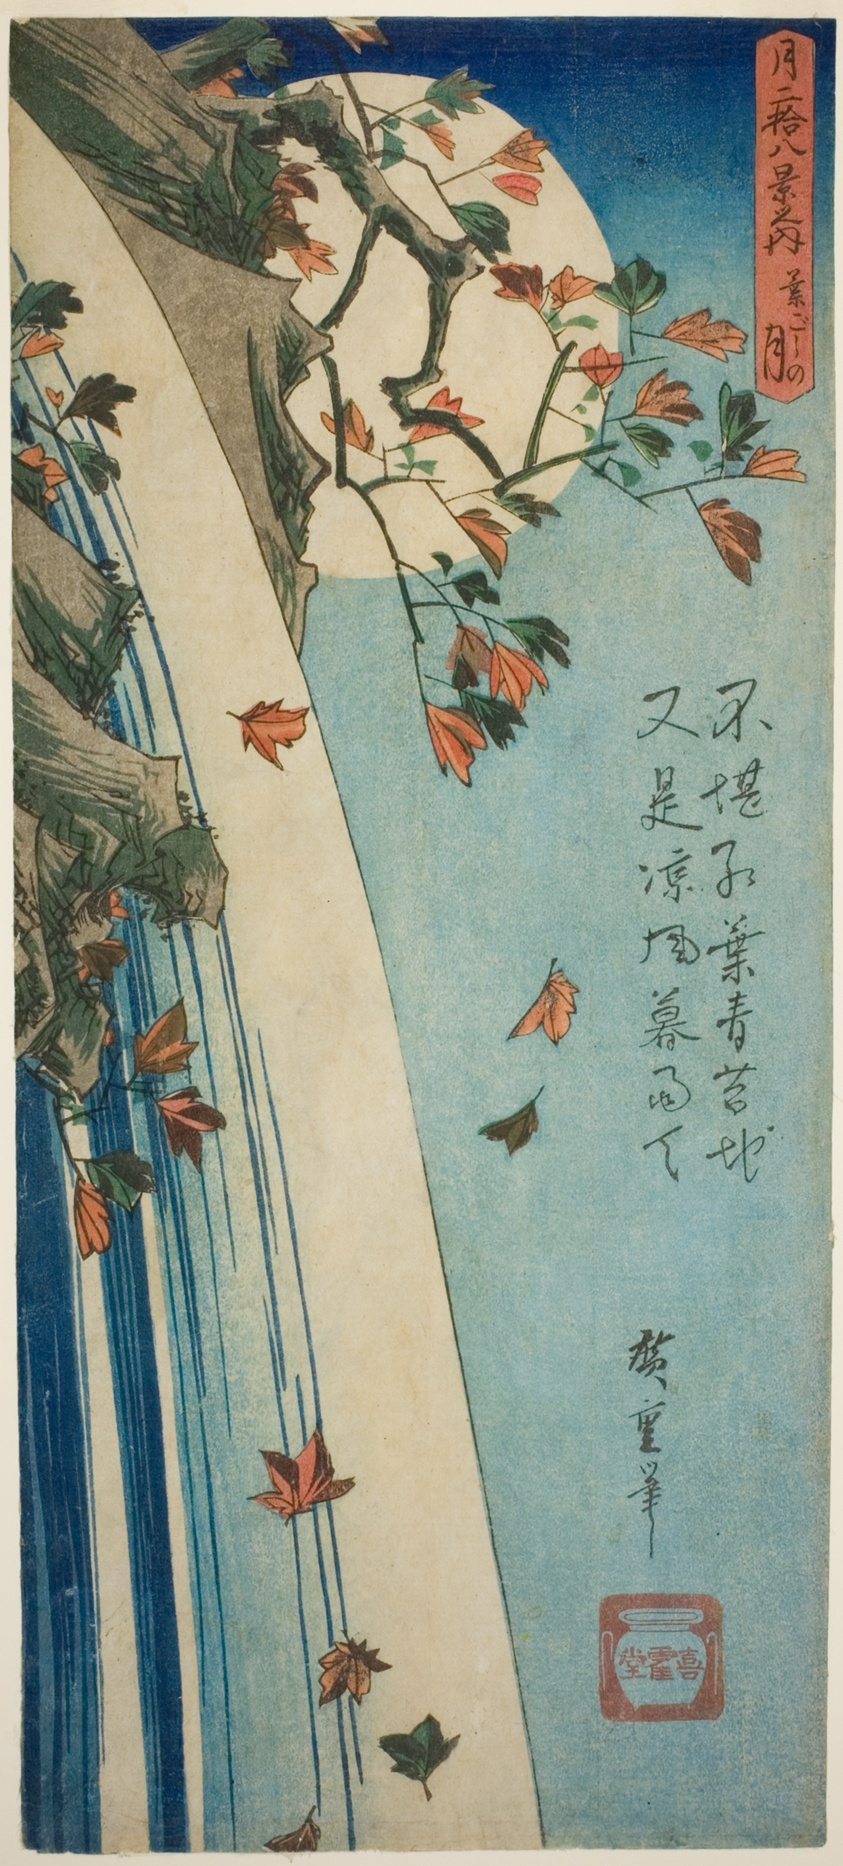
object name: Print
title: The Moon Seen Through Leaves (Hagoshi no Tsuki), from the series "Twenty-eight Views of the Moon (Tsuki nijuhakkei no uchi)"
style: Japanese (culture or style)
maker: Utagawa Hiroshige 歌川 広重; Japanese, 1797-1858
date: c. 1832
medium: Color woodblock print; otanzaku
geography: Japan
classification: woodblock print; print; asian art